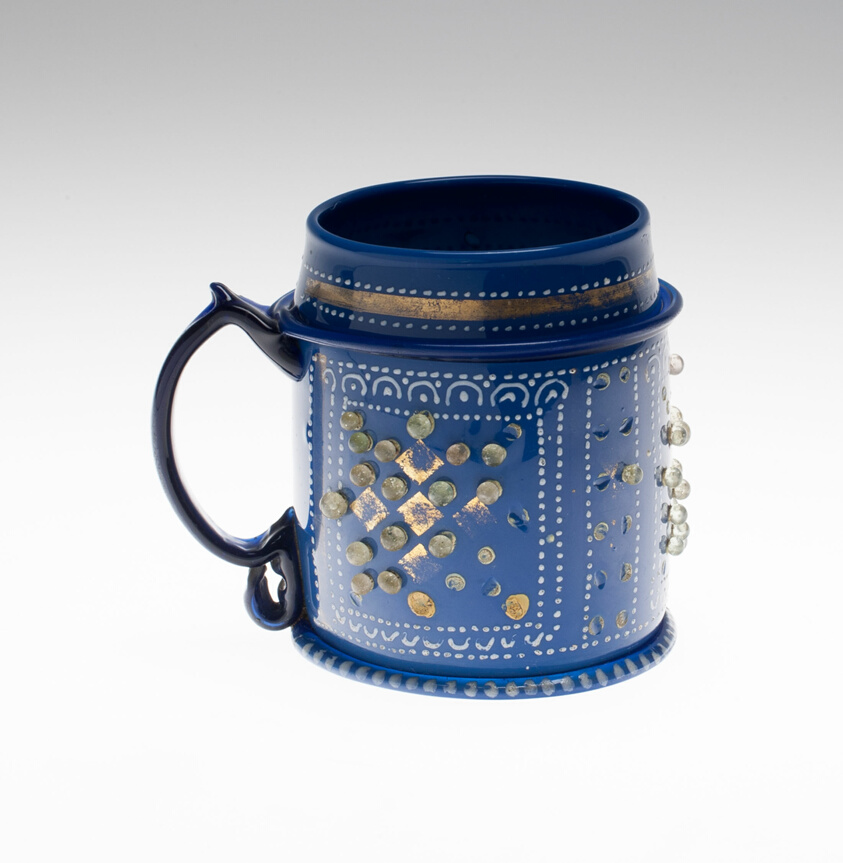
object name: Glass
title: Mug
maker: Bohemia, Czech Republic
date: c. 1600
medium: Opaque blue glass with transparent beads, colored enamels, and gilt decoration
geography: Bohemia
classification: glass; european decorative arts